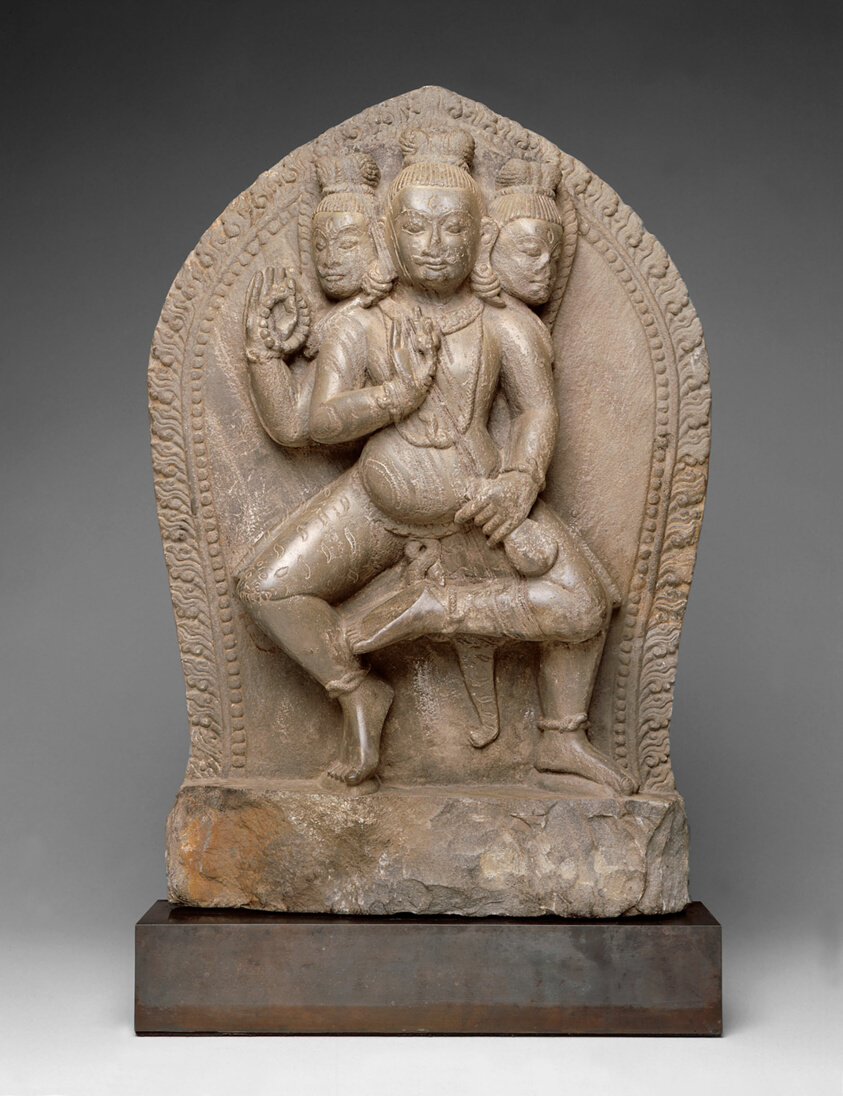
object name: Sculpture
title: Dancing Bhairava, A Horrific Form of God Shiva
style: Himalayan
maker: Nepal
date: 13th/14th century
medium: Gray schist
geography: Nepal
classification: sculpture; schist; stone; asian art